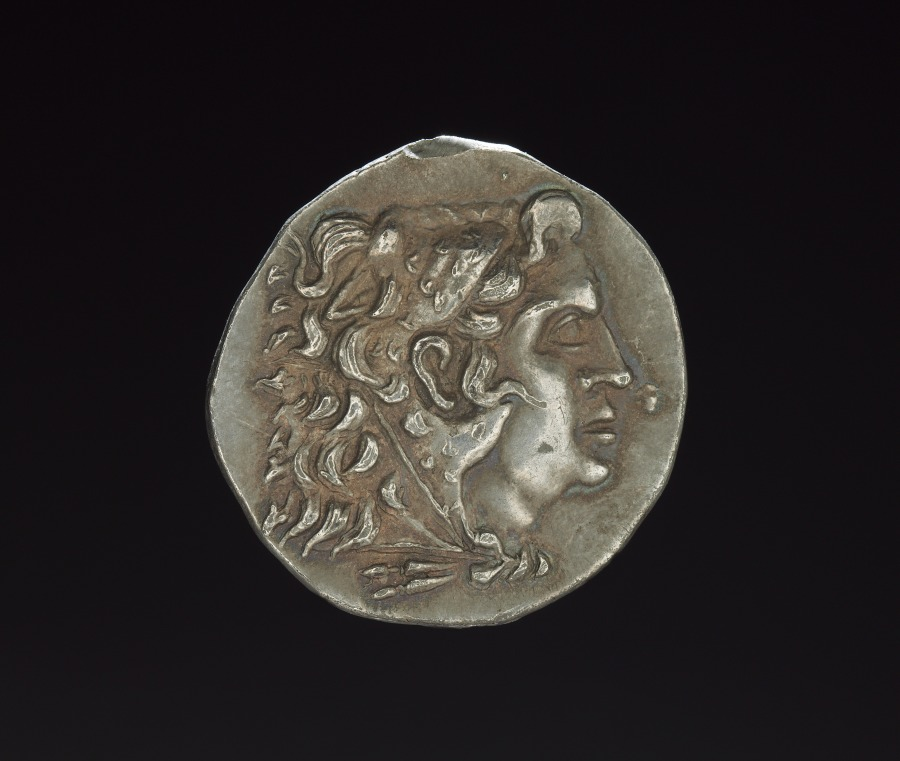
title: Indo-Greek Coin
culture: Afghanistan, Bactria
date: c. 200–1 BCE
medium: silver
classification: Silver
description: After Alexander of Macedon succeeded in conquering Egypt and Persia in 331 BC, his ambition to rule the known world led him further east across Bactria in Afghanistan, through the Hindu Kush mountain pass, and into India. There he succeeded in defeating all the local kings of the region until his men, on the brink of mutiny, insisted that they return to Greece. Alexander left governors in charge of his territories, and after his death in 323 BC, his governors became independent kings, establishing Hellenistic cities and a Greek cultural base in the region, which lasted for almost 200 years. The posthumous portrait of Alexander on the front of this coin depicts him wearing the lion scalp. He identified with Hercules, the mortal who became a god as a result of his superhuman feats, including the defeat of the Nemean lion.